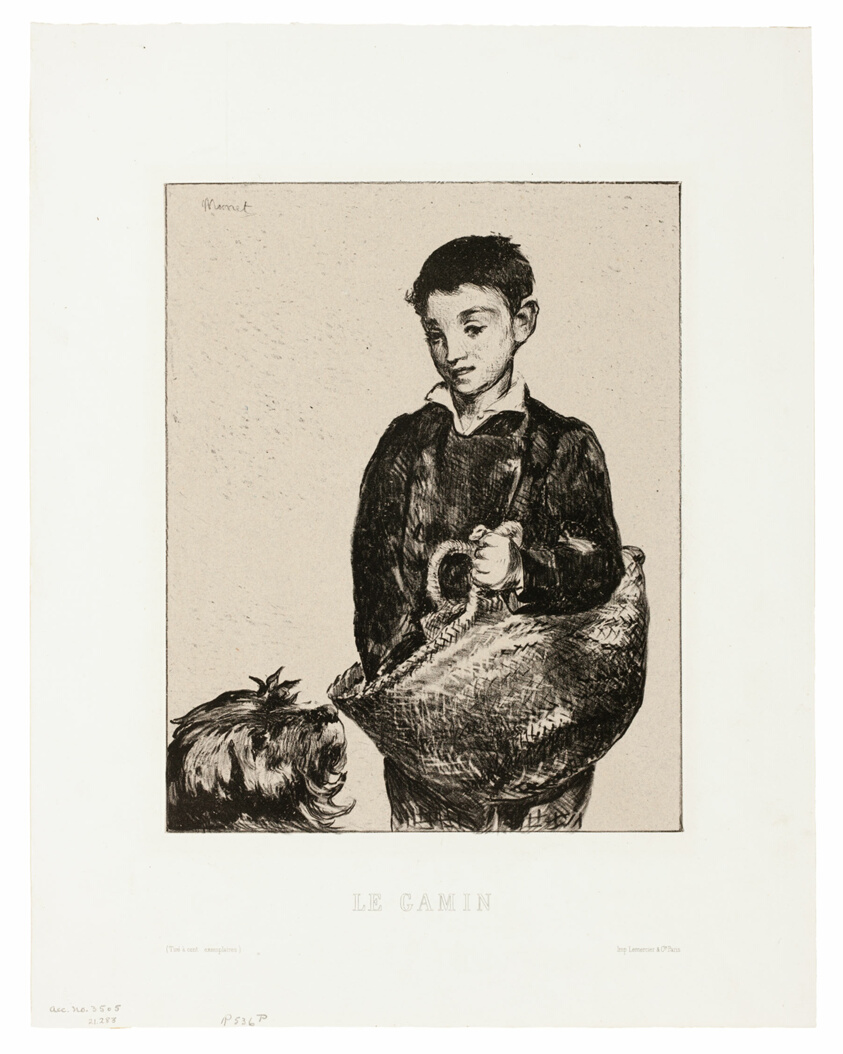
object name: Print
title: The Urchin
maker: Édouard Manet (French, 1832-1883); printed by Lemercier et Compagnie (French, 19th century)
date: 1868–74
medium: Lithograph in black, with scraping, on chine with blue and red fibers, laid down on ivory wove paper (chine collé)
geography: France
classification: lithograph; print; prints and drawing